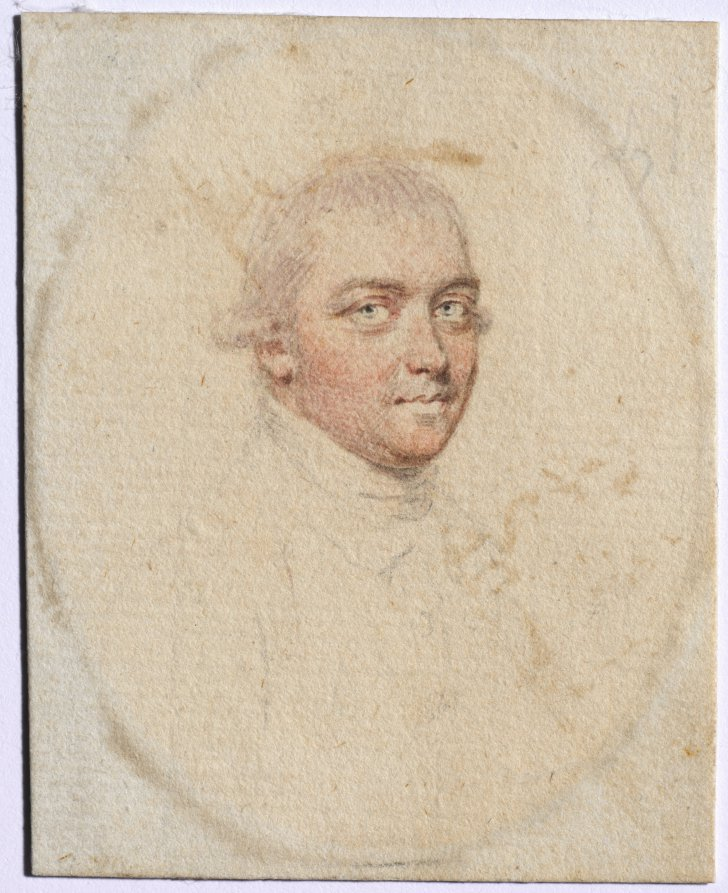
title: Portrait of Mr. Shippard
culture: England, 18th century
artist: John I Smart (British, 1741–1811)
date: c. 1776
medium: graphite and wash on laid paper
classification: Portrait Miniature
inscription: inscribed very faintly in graphite on front at upper right: 161; on back (paper backing to which drawing paper was adhered) inscribed in graphite, at top upside down: 161; also on paper backing in graphite, on a slant at lower left: Mr. Jones; inscribed on back of drawing, beneath paper backing, in graphite: Mr Shippar[d] large Bracelet size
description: Although it is impossible to say whether or not it was always part of the artist’s process to execute a preparatory sketch prior to painting each miniature, we do know that John Smart retained many hundreds of these sketches. A group of preparatory sketches—of which this portrait is one—descended through the Smirke family after Smart’s daughter Sarah gave a sketchbook containing preparatory portrait studies to her friend Mary Smirke, sister of the celebrated Victorian architect Sydney Smirke. This book was probably broken up around 1877 when its contents was divided between Sydney’s daughters Mary Jemmett and Mrs. Lange, whose portions were both sold at auction in 1928. G. C. Williamson was the first to suggest that Smart’s sketches were well known and that they were preparatory studies for the painted miniatures. Williamson listed the names of sitters from the sketches known to him at the time, and they include a Mr. Jones, the title formerly given to the sketch here. This designation was applied only to a paper backing that had been attached after the drawing had been removed from the sketchbook. There is no further evidence for this attribution, however. The sketch is of the sitter’s head only, with a slight suggestion of a high stock collar. His head faces to the left, and his light hair is combed straight back with a flat curl above his right ear. He is depicted in an oval, and the background is unpainted. The number 161 is inscribed in graphite on both the front of the drawing and its paper backing. Upon removal of the paper backing in 1993, an inscription in graphite was revealed. Perhaps written in the artist’s hand, it suggests that the sitter’s name may be Mr. Shippar[d]. There are no known portraits of this gentleman. The work can be dated to about 1776 because of its size, which, when painted on ivory, would have been around 2 inches in height. An inscription on the back of the drawing suggests that the miniature was to be mounted on a bracelet. To this date, the finished ivory for which this preparatory sketch was presumably undertaken has not been discovered.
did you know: Sketches helped John Smart work out the particulars of a portrait before commencing the miniature on ivory, and they were useful in the event that a duplicate might later be required.